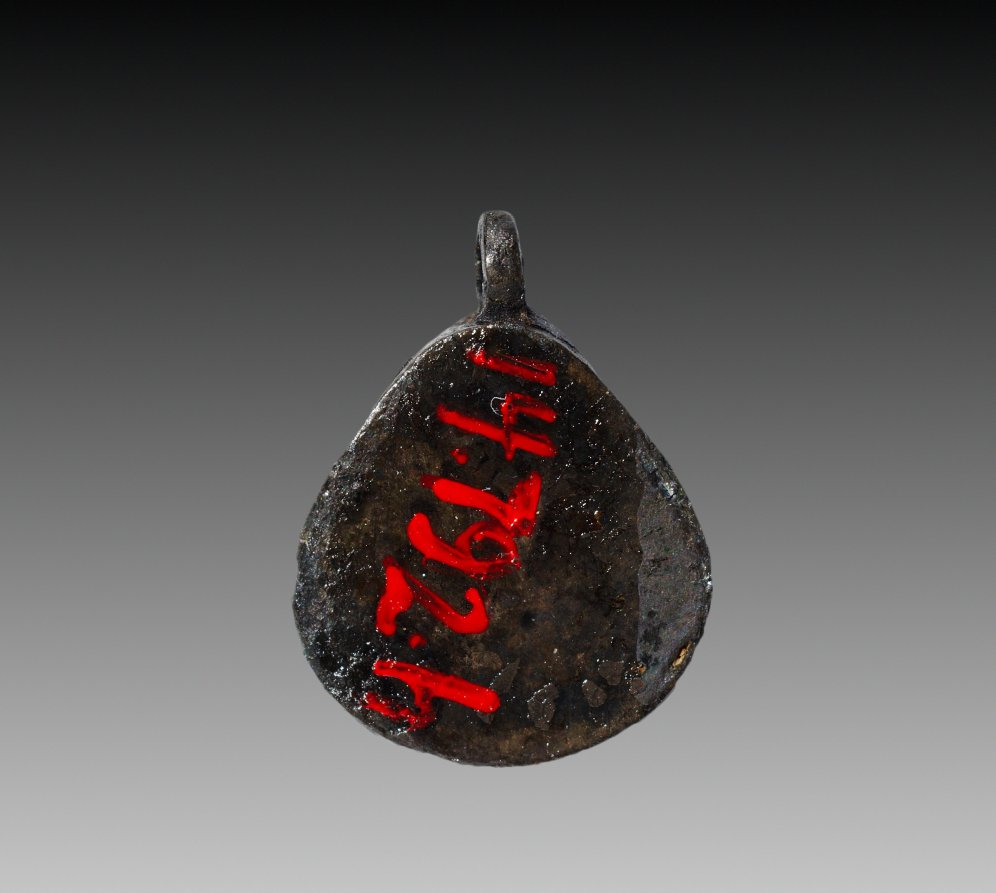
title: Oyster-Shell Pendant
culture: Egypt, Middle Kingdom (2040–1648 BCE), Dynasty 12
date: 1980–1801 BCE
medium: carnelian and silver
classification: Jewelry